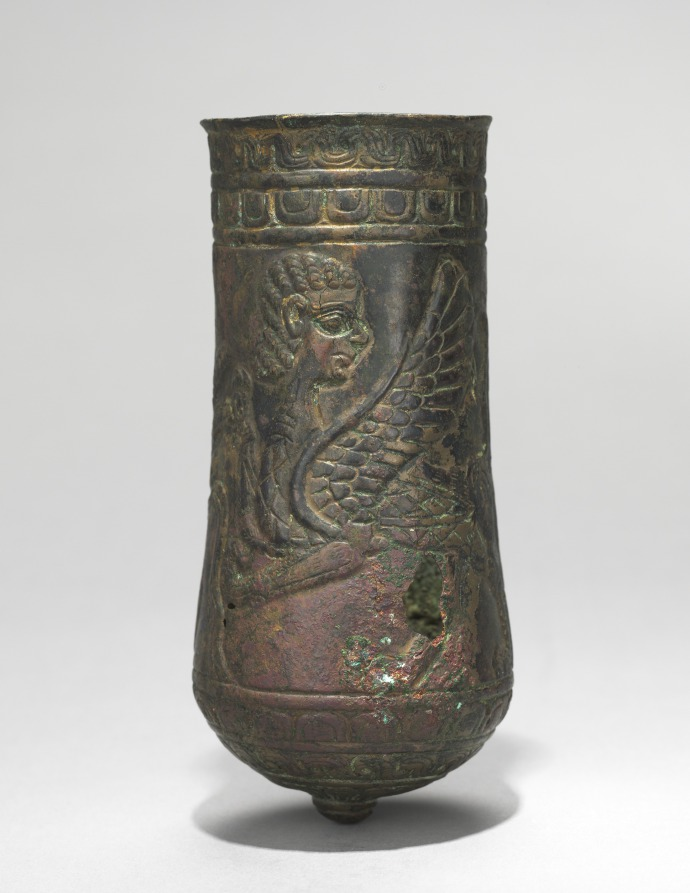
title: Button-Based Situla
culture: Iran, Luristan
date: 900–700 BCE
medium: bronze, repoussé, punched, incised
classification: Metalwork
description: The metalworkers of Luristan provided the Assyrian empire with elaborate bronze ornaments and vessels. These two situla are decorated symmetrically---one with ibexes drinking from an overflowing water jar; the other, with sphinxes.